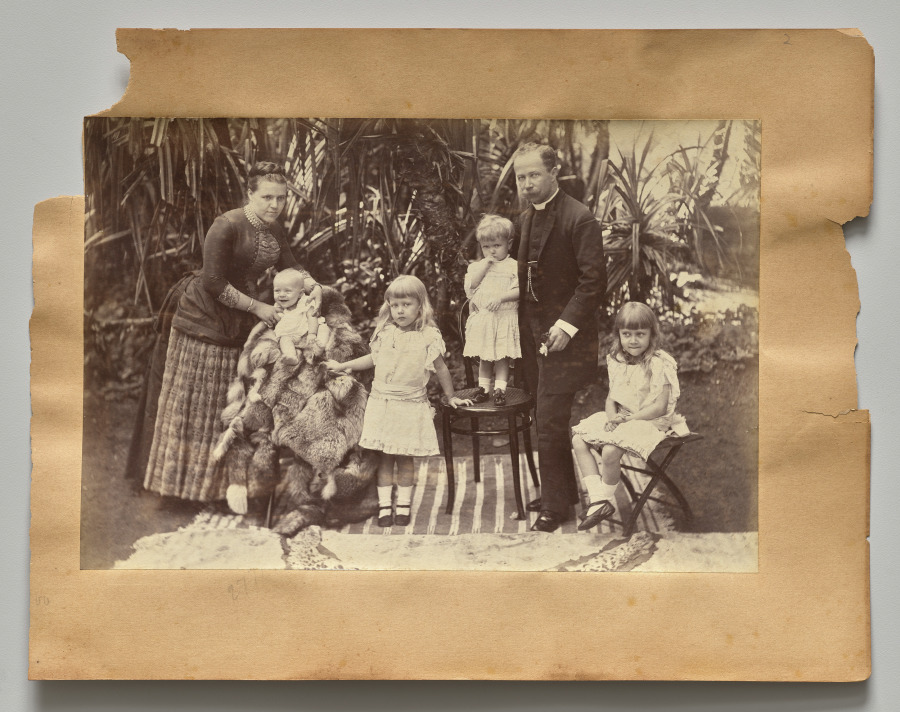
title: Untitled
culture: India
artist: Raja Deen Dayal (Indian, 1844–1905)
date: c. 1882–87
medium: albumen print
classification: Photograph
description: These photographs are part of an album, now disassembled, of around 105 photographs taken in India between 1885 and summer 1887 that provide glimpses into the lives of the British colonial elite and royal and upper-class Indians. The museum holds another group of 37 pictures from this album (2016.266), which was probably commissioned by a British civil servant visiting or working in India around 1888 as a personal souvenir of his experiences there.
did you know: Raja Deen Dayal is regarded now, and was considered during his lifetime, to be India’s most important 19th-century photographer.